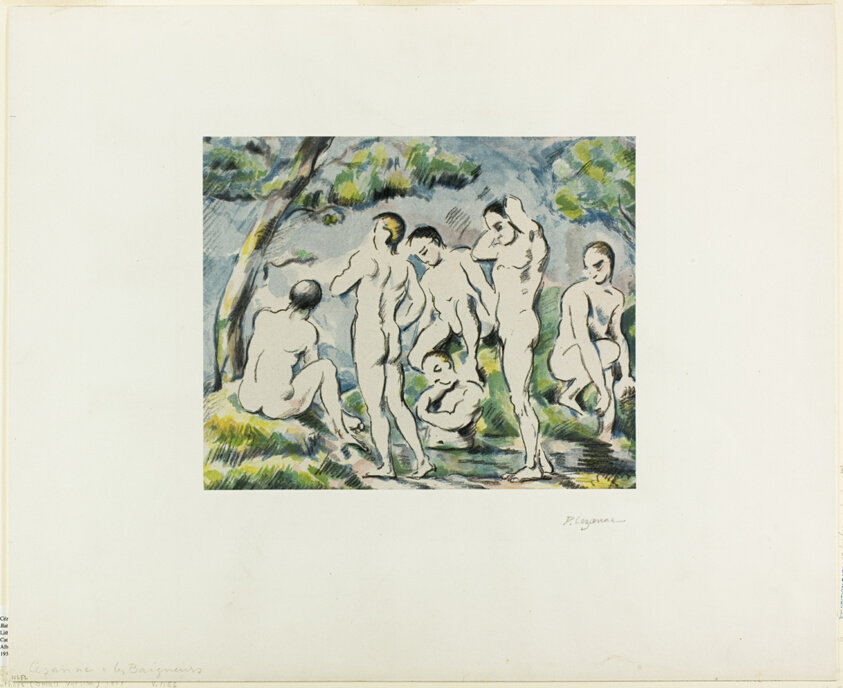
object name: Print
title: Bathers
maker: Paul Cézanne; French, 1839-1906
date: published 1897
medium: Color lithograph on ivory China paper, laid down on ivory wove card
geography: France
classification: lithograph; print; prints and drawing